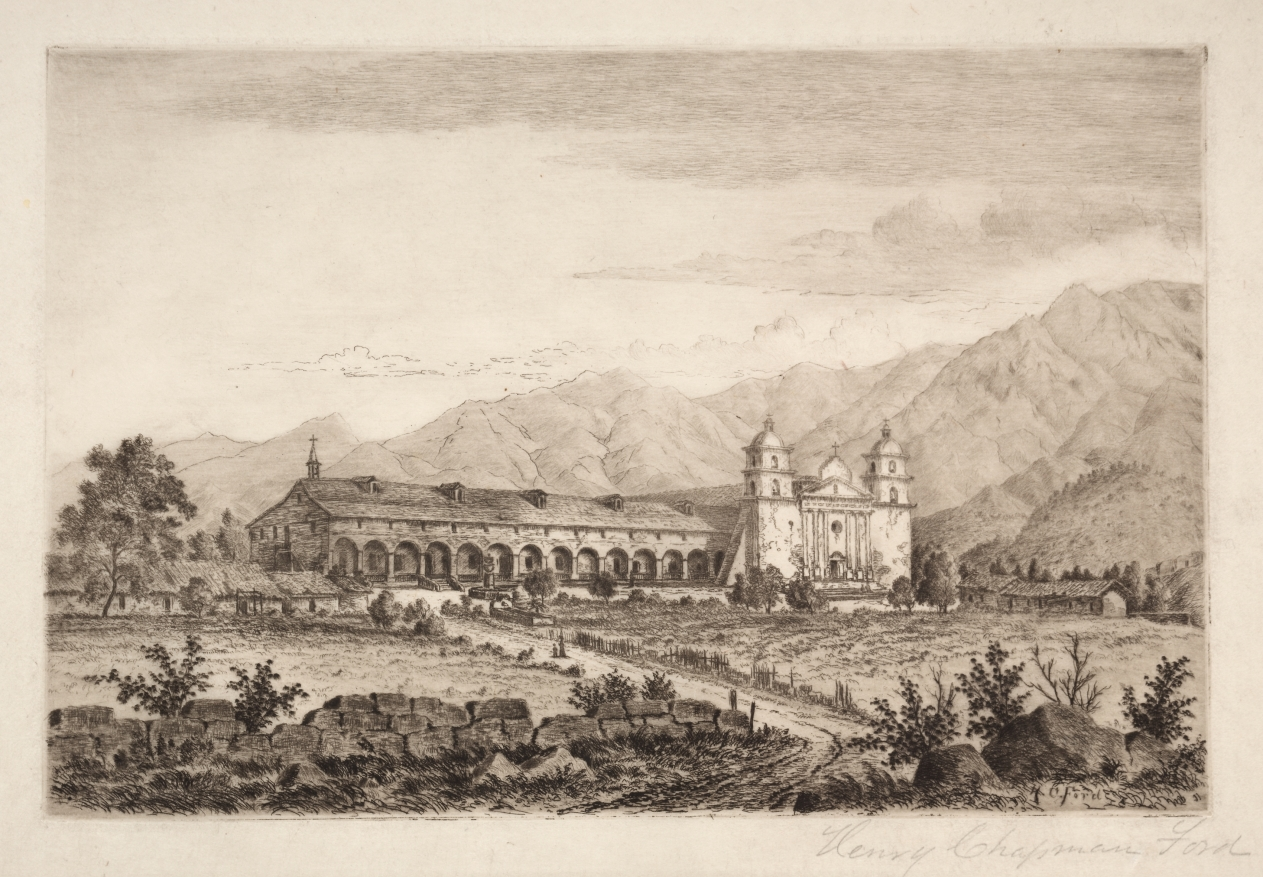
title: Santa Barbara Mission, from the series, Etchings of the Franciscan Missions of California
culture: America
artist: Henry Chapman Ford (American, 1828–1894)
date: 1883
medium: etching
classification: Print